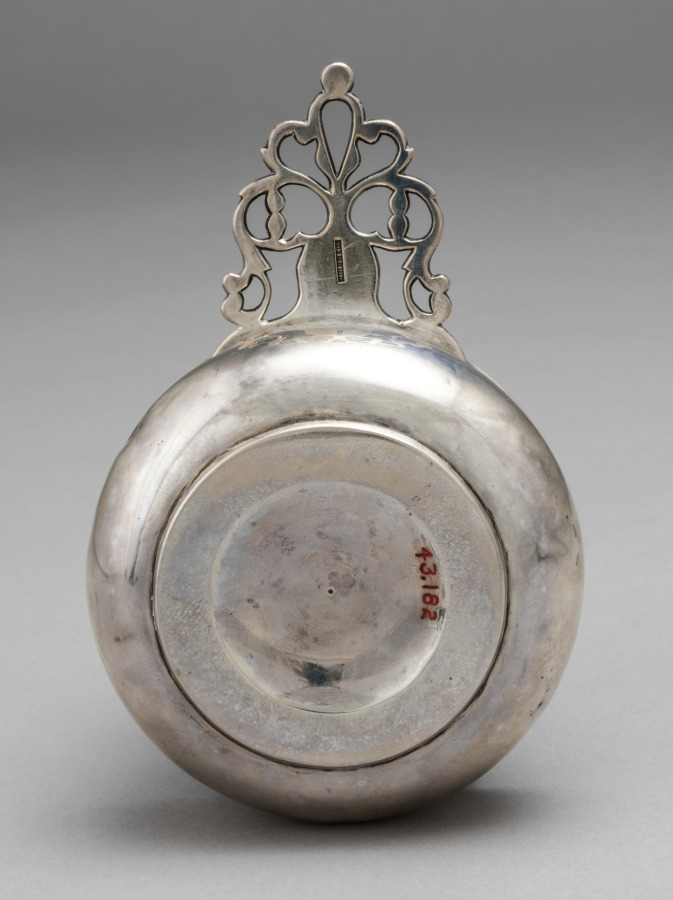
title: Porringer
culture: America, Massachusetts, Newburyport, late 18th-early 19th Century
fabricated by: William IV Moulton (American, 1772–1861)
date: c. 1800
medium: silver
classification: Silver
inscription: engraved "JFS" (or JFT) in bright-cut script on top of handle.